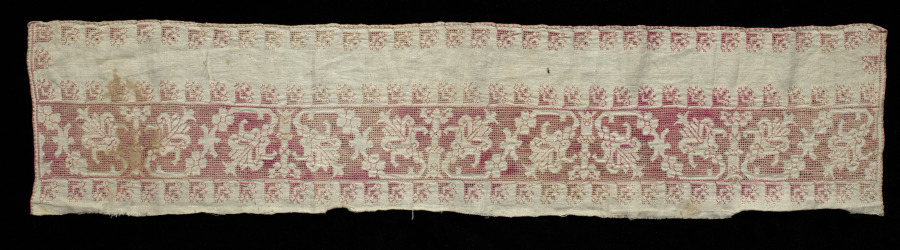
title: Band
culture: Italy, Sicily, 1760-1800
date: 1760–1800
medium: Linen: needle lace (drawnwork) and embroidery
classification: Lace